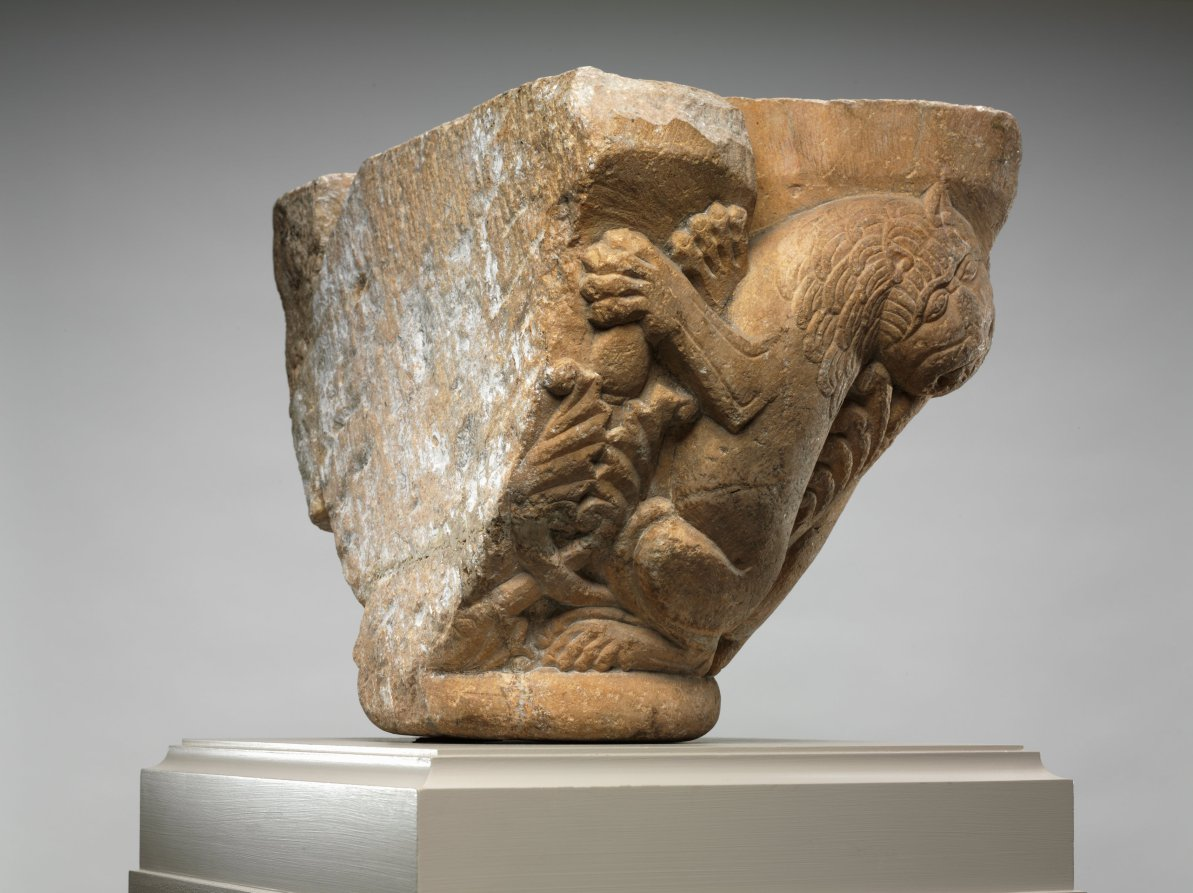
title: Engaged Capital with Lions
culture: Northern Spain (Navarre ?) or Southwest France (Pyrénées or Roussillon ?), mid-12th century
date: 1145–64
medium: marble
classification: Sculpture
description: The compositional motif of confronted and addorsed beasts illustrated on this capital was especially popular in churches along the pilgrimage roads.